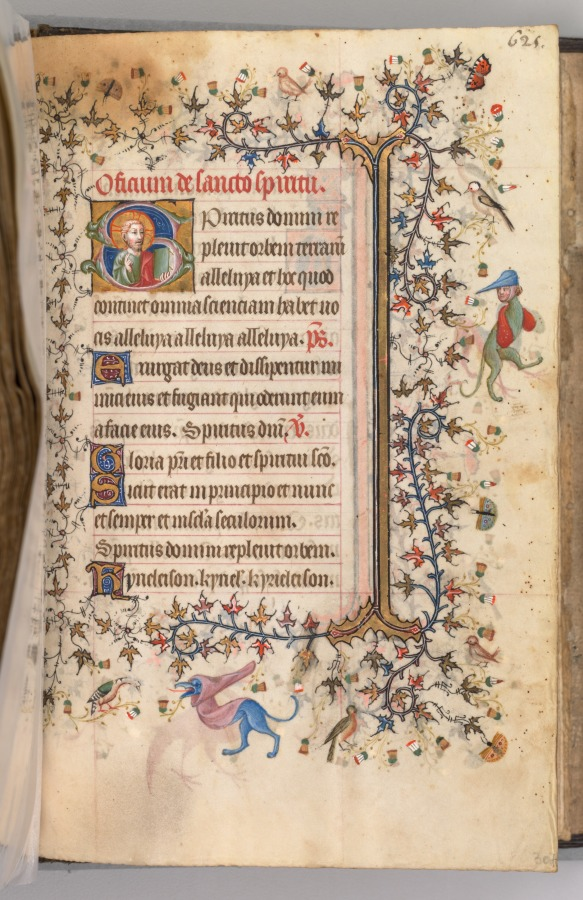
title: Hours of Charles the Noble, King of Navarre (1361-1425): fol. 307r, Bust of Christ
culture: France, Paris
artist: Master of the Brussels Initials and Associates (French)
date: c. 1405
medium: ink, tempera, and gold on vellum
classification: Bound Volume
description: This precious volume was obviously highly prized by its owner, the French-born King of Navarre, who had his coat of arms painted on no less than twenty folios. Rather than directly commissioning this manuscript from a specific workshop, it seems that Charles the Noble acquired his book of hours -- perhaps ready-made for the luxury market -- while on a trip to Paris in 1404-05. A collaborative effort, six painting styles are evidenced within the pages of this codex, those of two Italians, two Frenchmen, and two Netherlanders. The painter who was responsible for the planning and decoration of the book, and who produced seventeen of the large miniatures, was a Bolognese artist known as the Master of the Brussels Initials. His principal assistant, responsible for most of the borders, was a Florentine who signed his name "Zecho" da Firenze on folio 208 verso.